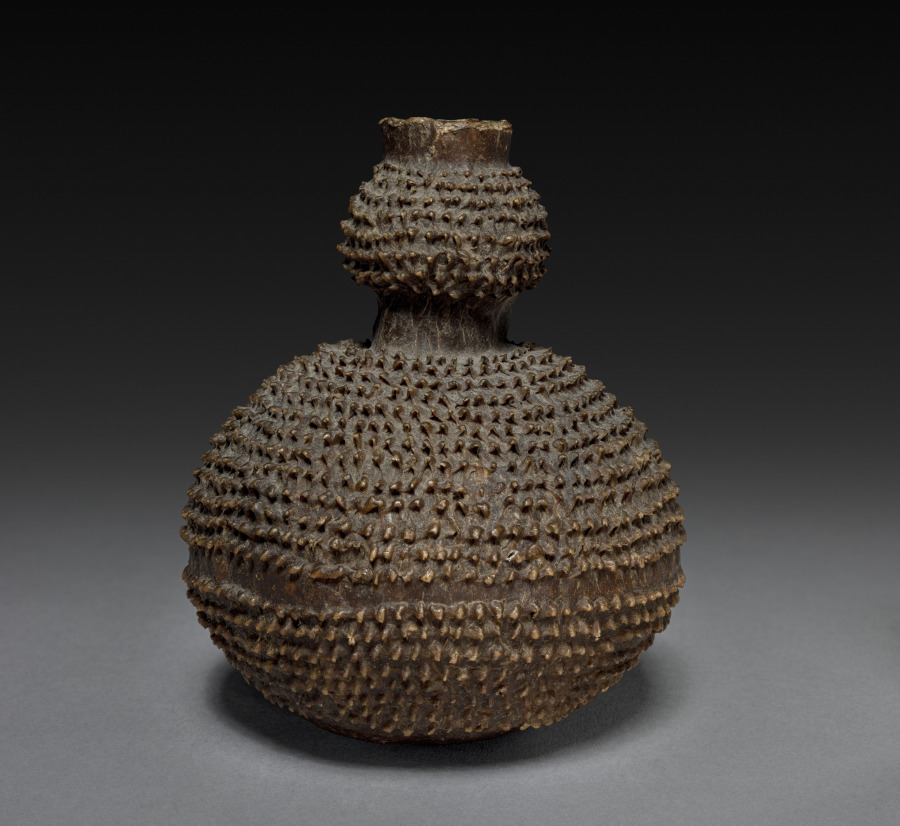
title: Snuff Container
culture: Africa, Southern Africa, South Africa, Xhosa-style maker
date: late 1800s or early 1900s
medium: Hide, earth, and blood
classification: Vessels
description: Snuff containers made from a mixture of hide, earth, and blood constitute a very rare type of object in the artistic production of southern Africa. The specific gourdlike shape is an even more unusual occurrence. Its materials and purpose refer to the communication between animals and humans.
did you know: The tobacco product snuff was stored in decorative, yet useful, containers like this one.